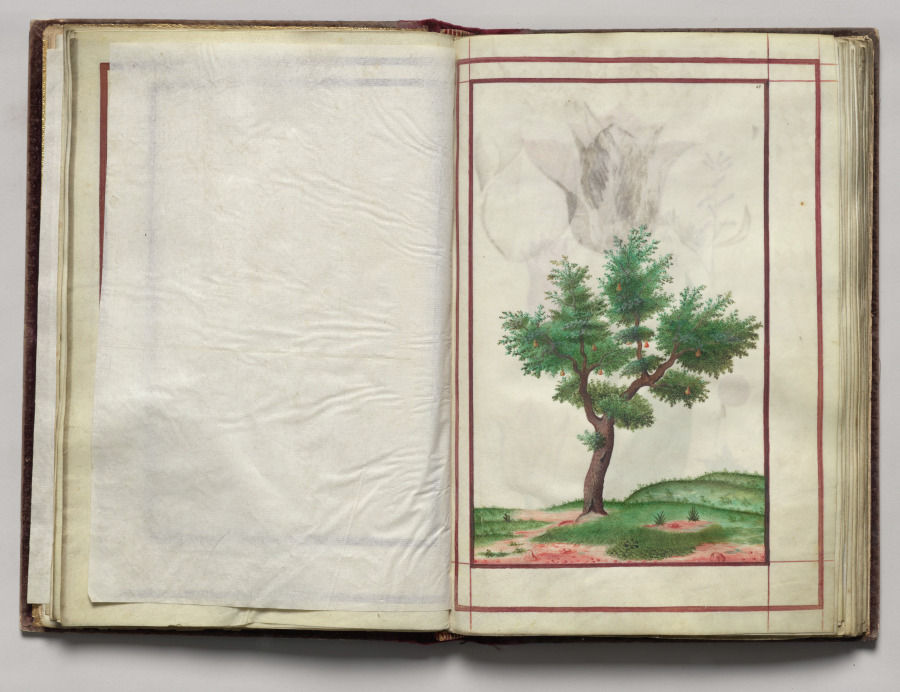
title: Pear Tree in Landscape, folio 13 (recto), from Florilegium (A Book of Flower Studies)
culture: France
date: 1608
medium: watercolor, ink, silver, and gold over occasional traces of pencil, on vellum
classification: Bound Volume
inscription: Dated: Poitiers 1608 (on frontispiece) Signed: On frontispiece in black ink, lower right: Van Kuyk Notation on drawing: Frontispiece: in pencil, lower margin: * élève de Van Kessel, peintre flammand (* in pencil also appears in front of Van Kuyk's name).